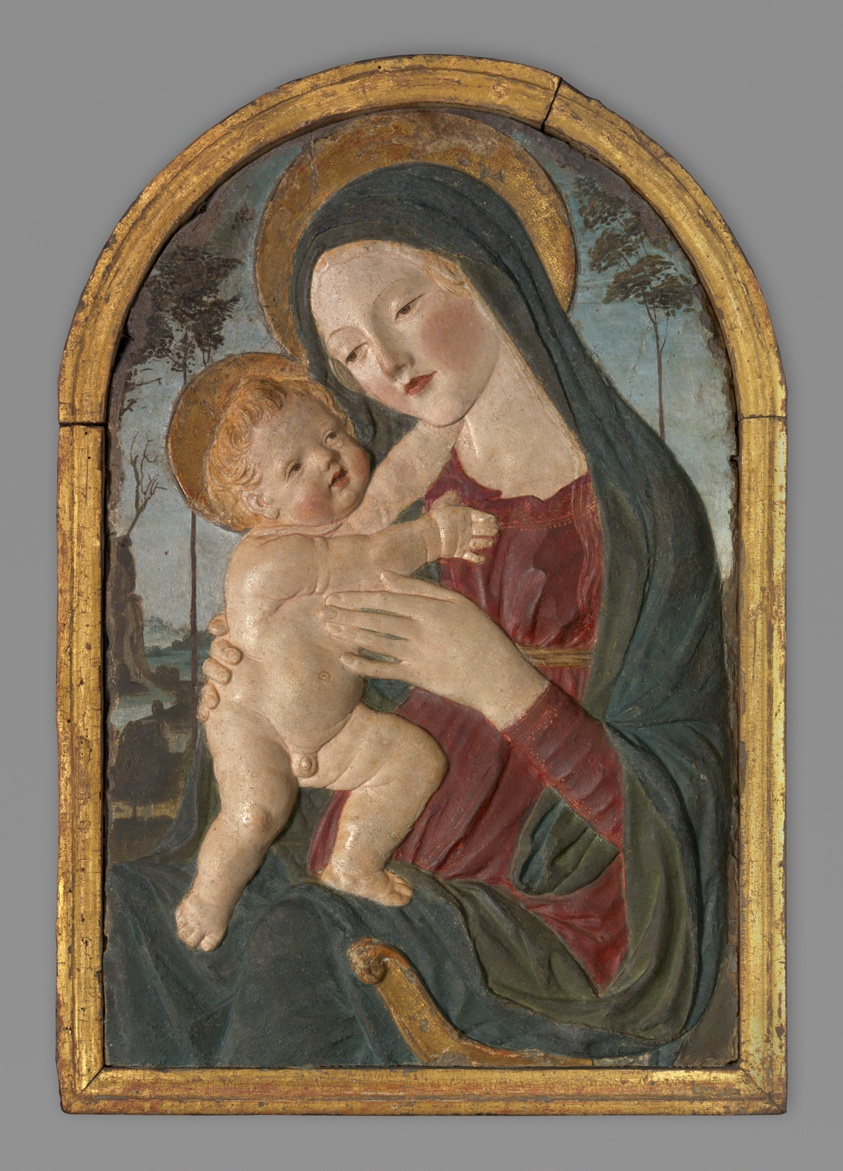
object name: Sculpture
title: Madonna and Child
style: 15th century, sixteenth century, 16th Century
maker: Workshop of Neroccio de' Landi (Italian, 1447–1500)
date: 1490/1500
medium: Tempera and gold on stucco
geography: Italy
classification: relief; tempera; stuccowork; painting; paint; Italian; sculpture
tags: Virgin and child/Madonna and child, Virgin Mary, Jesus, mother, mother and child, children, babies, boys, religion, religious, religious figures, nudes, landscape, Devotion, Christian subjects, Christianity